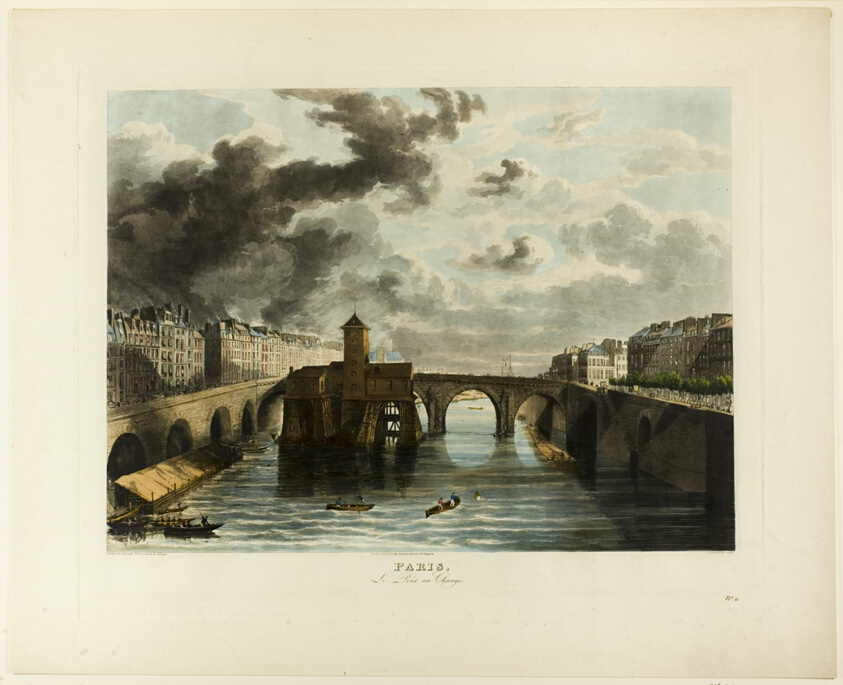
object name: Print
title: Paris, Le Pont-au-Change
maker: John Gendall (English, 1790-1865); after Thomas Sutherland (English, 1785-1825); or after Charles Augustus Pugin (English, born France, 1762/69-1832); published by Lewis & Johnson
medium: Aquatint etching on paper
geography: England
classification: aquatint; print; prints and drawing